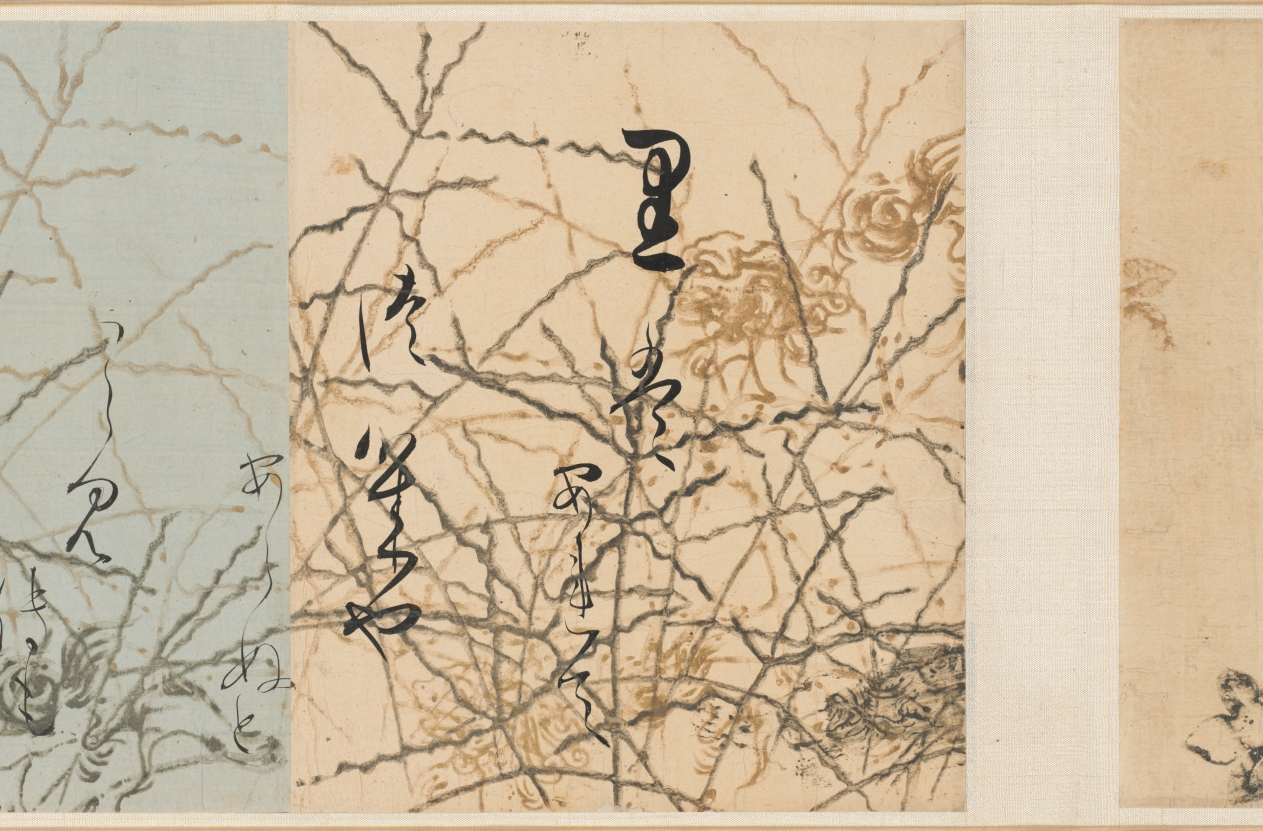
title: Selections from the New Collection of Japanese Poems from Ancient and Modern Times (Shinkokin wakashū) with Printed Designs of Chinese Lions and Crab Finger Grass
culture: Japan, Edo period (1615–1868)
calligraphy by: Hon'ami Kōetsu (Japanese, 1558–1637)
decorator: Tawaraya Sōtatsu (Japanese, c. 1570–c. 1640)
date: early 1600s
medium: handscroll; ink, gold, and silver on paper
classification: Calligraphy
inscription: Seal: 光悦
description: Hon’ami Kōetsu was a calligrapher and craftsman who frequently collaborated with the painter Tawaraya Sōtatsu, considered the first master of the Rinpa school. Kōetsu brushed seven poems from the autumn section of a poetry anthology onto dyed paper with motifs designed and printed in gold and silver by Sōtatsu.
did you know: Before becoming a master painter of screens, Tawaraya Sōtatsu painted fans.